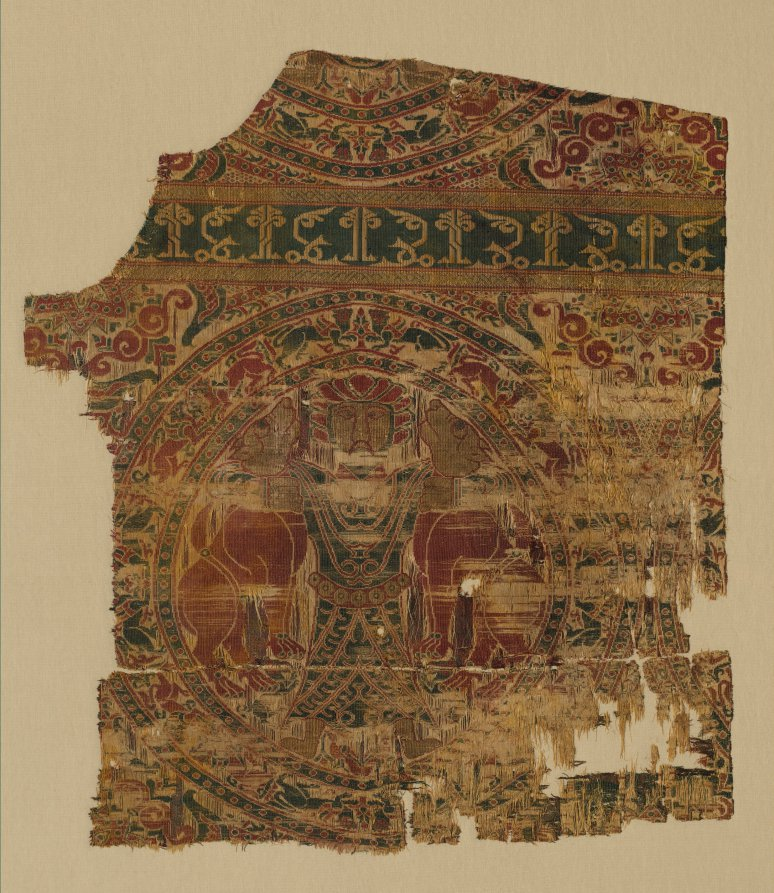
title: Fragment with Lion Strangler from a Dalmatic of Saint Bernard Calvo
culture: Spain, Almeria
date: 1200–1243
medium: Silk and gold thread: lampas, taqueté, and plain-weave variant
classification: Textile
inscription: the inscription (incorrectly written) appears to read "al-'amir" (command, i.e. authority) [alternately retrograde and vice versa].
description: Within the elaborate roundel, a bearded man with a belted tunic strangles a lion in each hand. Gold thread shimmers on their heads and his hands. In the inscription band across the top, an Arabic word has been written with mirror-image symmetry. It can be read as al-yumn, primarily translated as prosperity. The central motif of this renowned silk is a pre- Islamic Persian symbol of royal power. Both Muslims and Christians throughout the Iberian Peninsula admired such textiles. Members of the Catholic clergy incorporated it into a dalmatic—a long ceremonial tunic. It was found in the late 1800s in the tomb of Saint Bernard Calvo, Bishop of Vich (1180–1243).